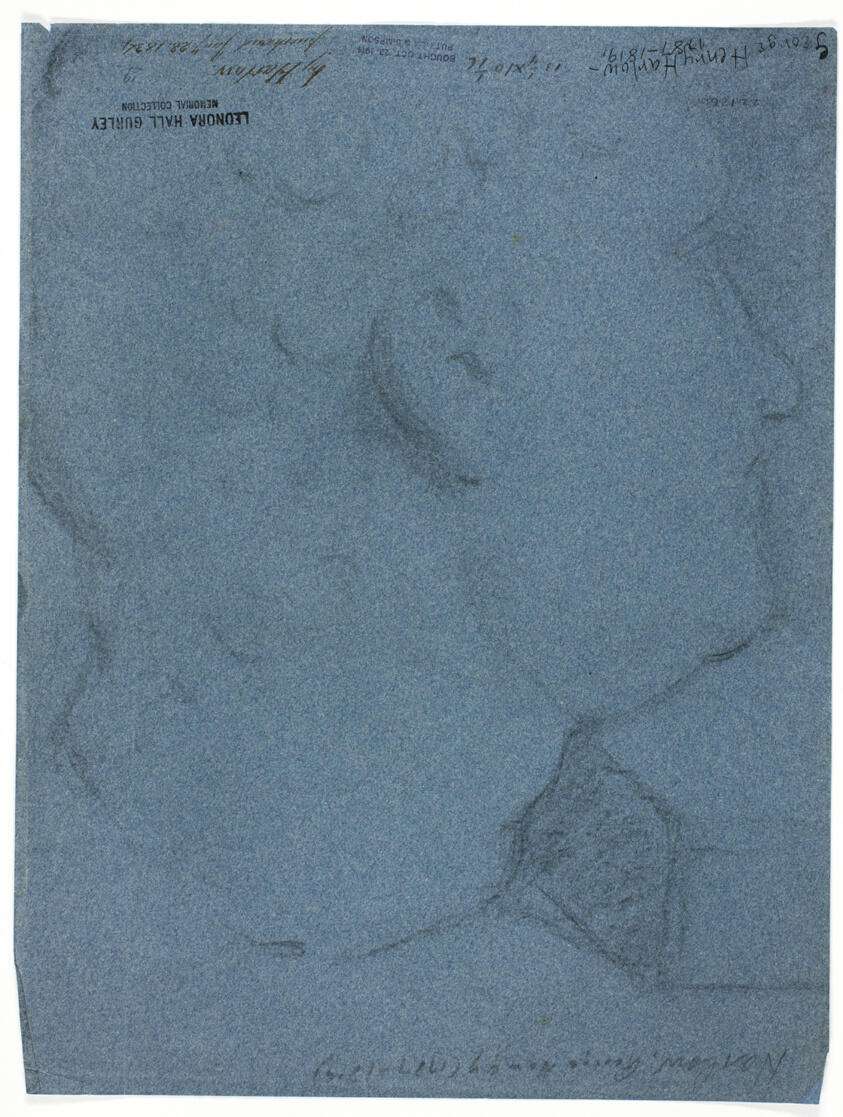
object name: Drawing and Watercolor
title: Profile of Head after a Cast (recto and verso)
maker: Attributed to George Henry Harlow; English, 1787-1819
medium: Charcoal (recto and verso) on blue wove paper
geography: England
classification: charcoal; paper; drawings (visual works); prints and drawing